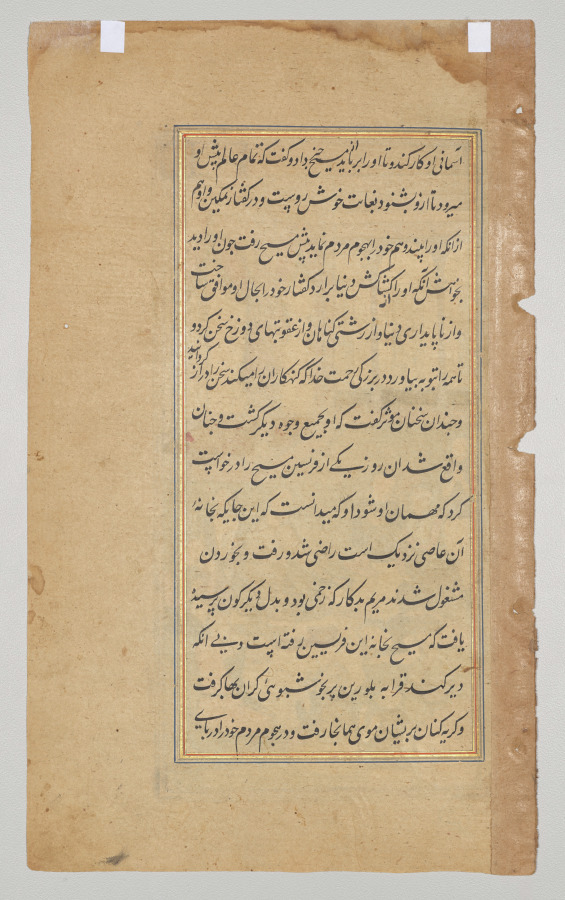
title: Mary Magdalene Presents Ointment to Jesus (folio 102 verso), from a Mirror of Holiness (Mir’at al-quds) of Father Jerome Xavier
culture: Mughal India, Allahabad, made for Prince Salim (1569–1627)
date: 1602–04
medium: Gum tempera, ink, color, and gold on paper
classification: Manuscript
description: While Jesus dined in the house of a Pharisee he was approached by Mary Magdalene, who threw herself to the ground and wept on Jesus’s feet with her tears. She then dried them with her hair and bathed them with expensive ointment. Her veil falls around her shoulders to reveal her hair’s disarray. Only Jesus appears to be calm as he extends his arms in a pacifying gesture; the other men point at their mouths and at each other, astonished at the dramatic behavior of this woman known to have been a prostitute. The plain black carpets and thin application of paint in some areas indicate that this painting was not finished.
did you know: Proportions of the portico and pavilion reveal some grasp of Renaissance ideals.